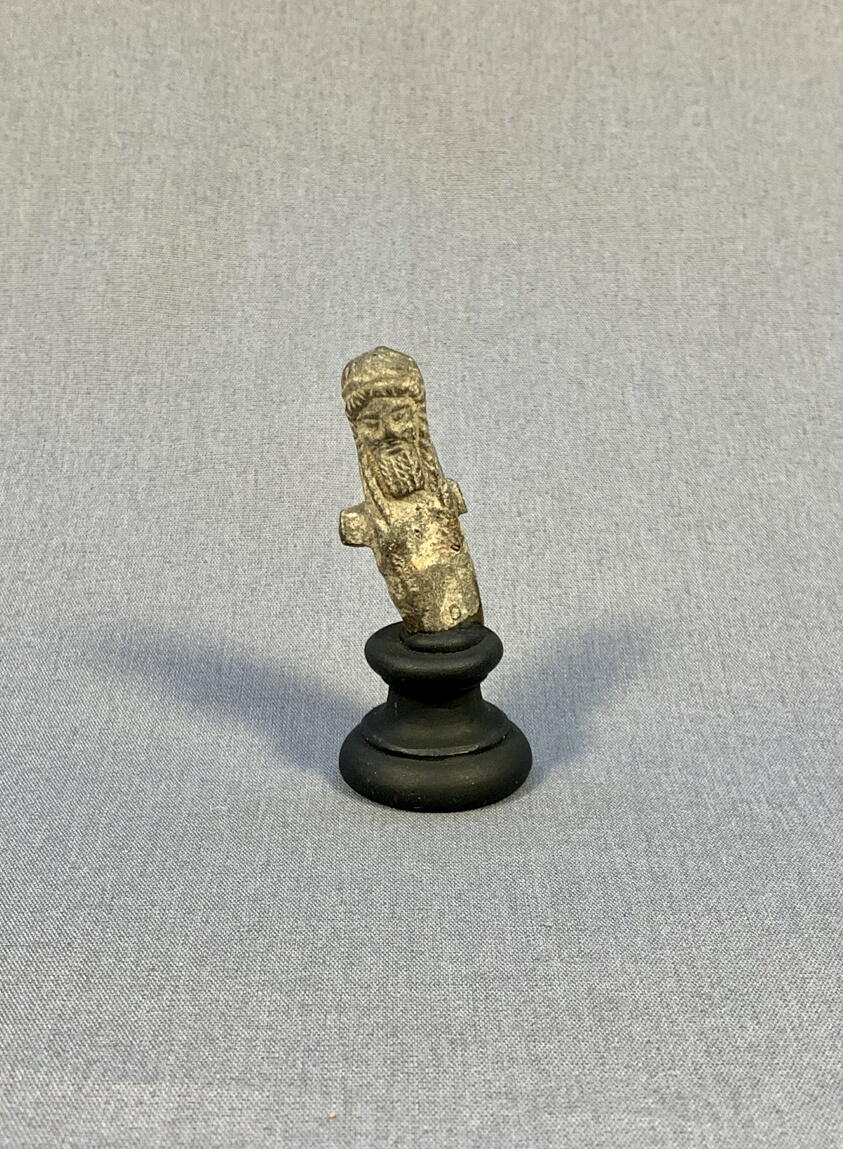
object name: Sculpture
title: Fragment of a Herm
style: greek, ancient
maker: Greek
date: 3rd-2nd century BCE ?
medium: terracotta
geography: Greece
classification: earthenware; ceramics; sculpture; ancient art